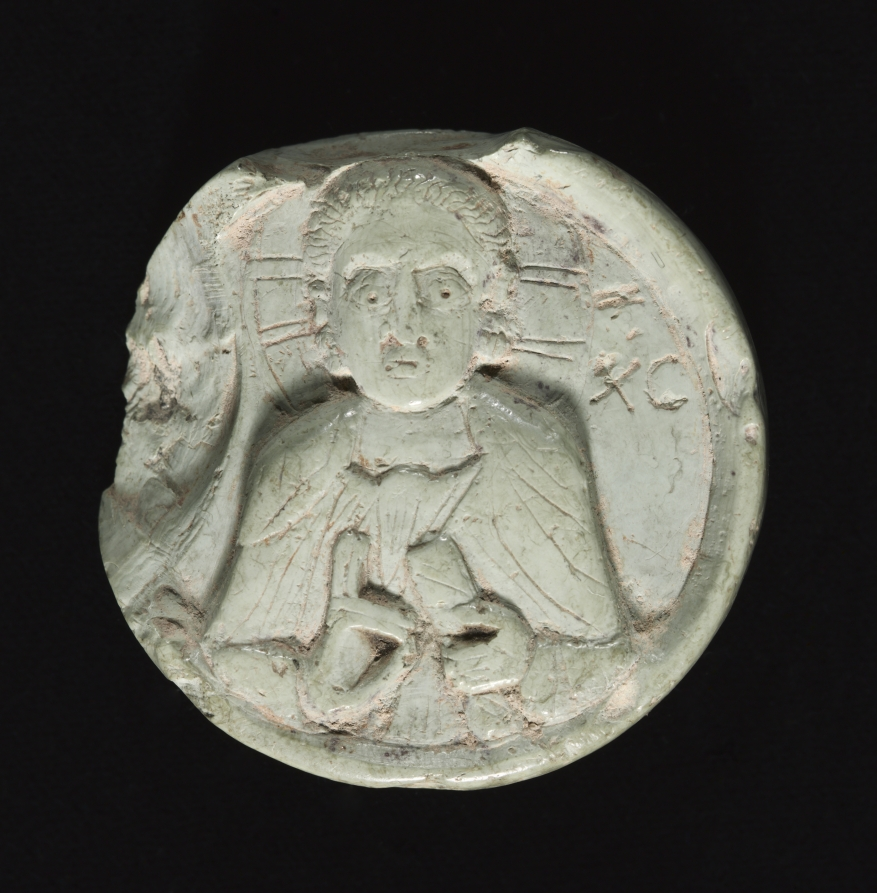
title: Medallion with Christ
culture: Byzantium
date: c. 1200–1400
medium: steatite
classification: Glyptic